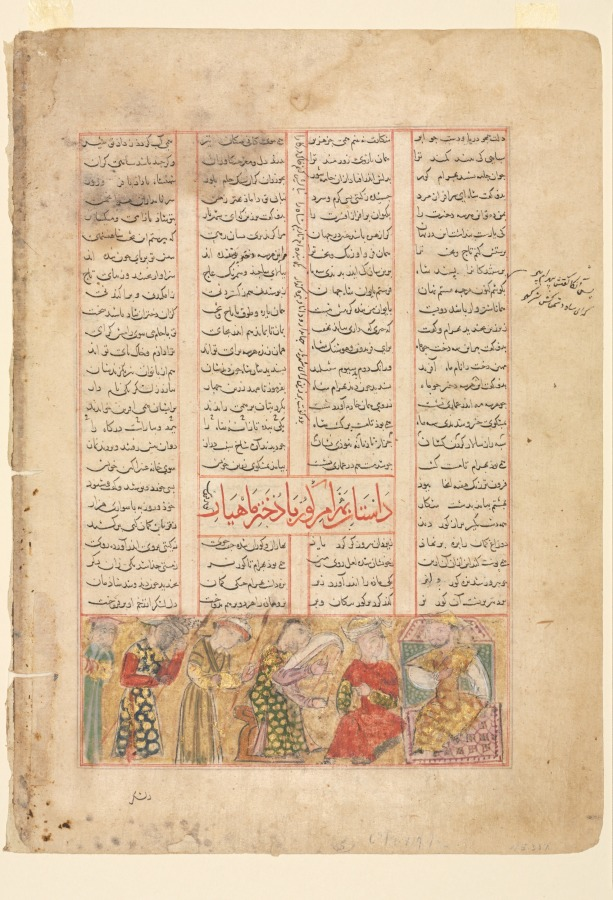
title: Text Page, Persian Verses (recto); Bahram Gur meets Arzu, the Daughter of Mahiyar (verso)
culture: Iran, Shiraz, Inju Period, 14th Century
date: c. 1350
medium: ink and opaque watercolor on paper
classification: Manuscript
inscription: script: Naskh